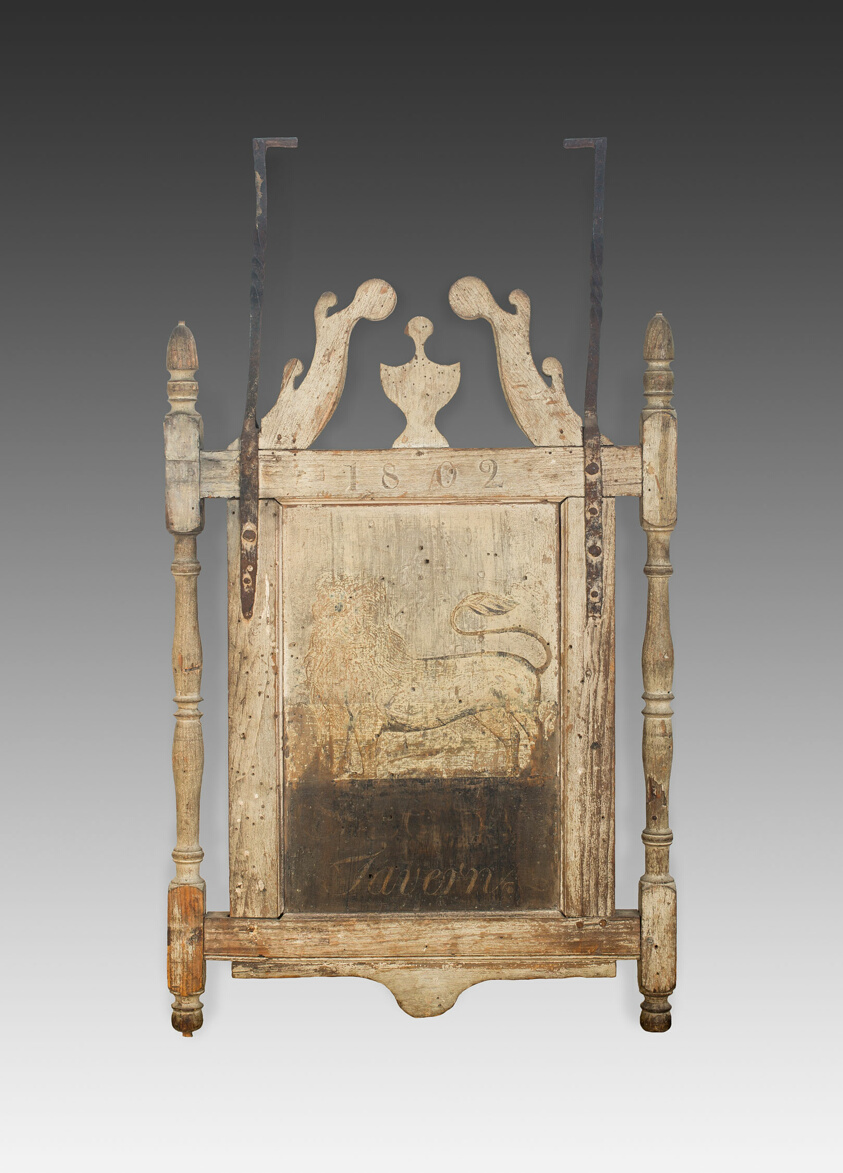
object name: Decorative Arts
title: Tavern Sign: Arnold's Inn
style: Folk Art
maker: Artist unknown (American, 18th century)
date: 18th century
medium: Painted white pine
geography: United States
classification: wood; american decorative arts; american arts; decorative arts